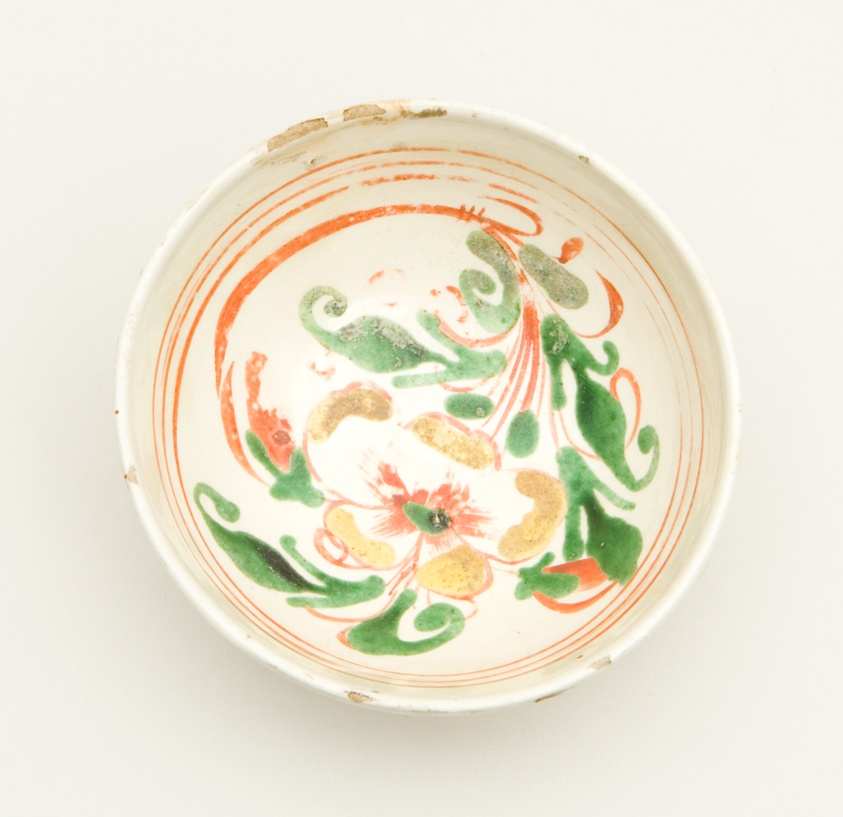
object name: Vessel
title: Bowl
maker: China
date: Jin dynasty (1115–1234), c. 13th century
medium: Cizhou ware, stoneware painted with white slip. iron-brown slip, overglaze enamels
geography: China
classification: vessel